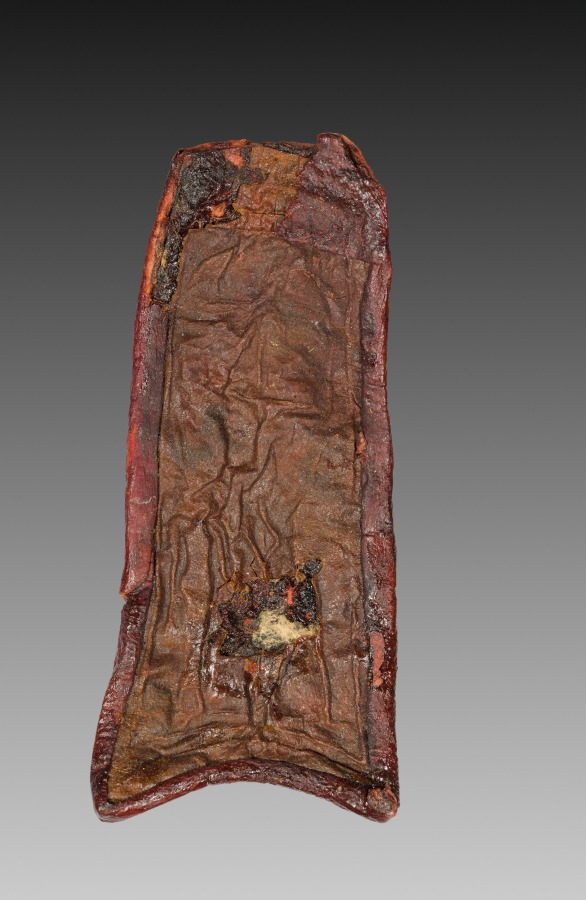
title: Mummy Band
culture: Egypt, Third Intermediate (1069–715 BCE), Dynasty 22, reign of Osorkon I (992–887 BCE)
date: 945–715 BCE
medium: stained leather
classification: Funerary Equipment